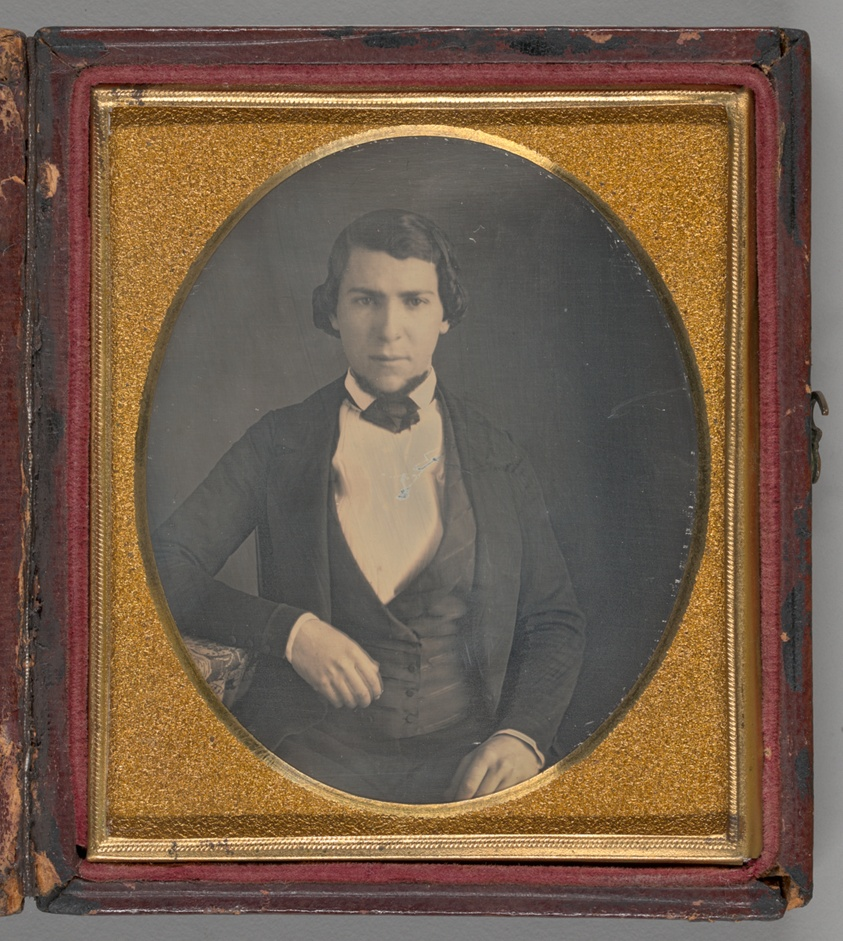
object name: Photograph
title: Untitled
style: 19th century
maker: Artist unknown; 19th century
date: 1839/60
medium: Daguerreotype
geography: Unknown Place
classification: daguerreotype; photographic process; photography; photograph